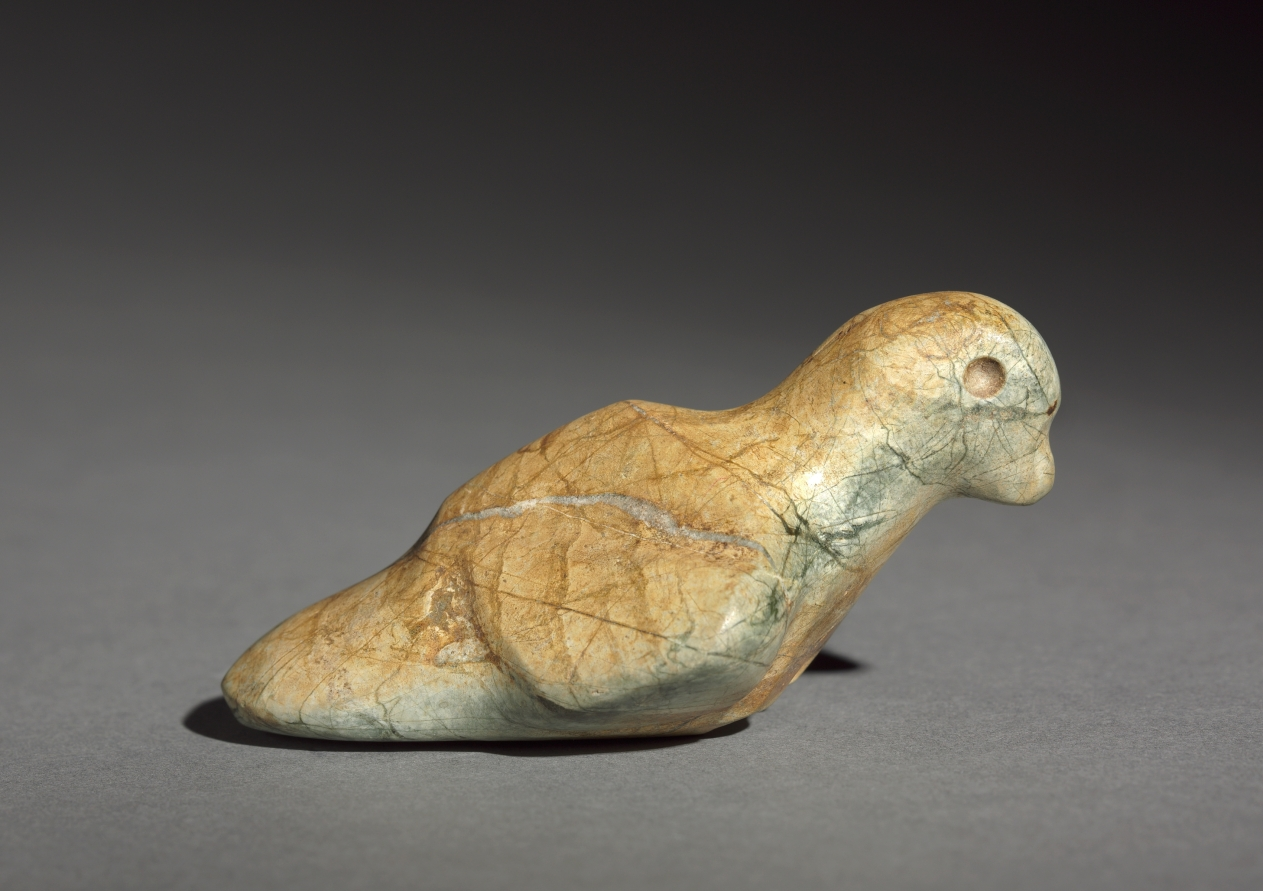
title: Bird Pendant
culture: Mesoamerica, Mexico, Guerrero, Mezcala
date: 100 BCE–300 CE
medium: polished gray-brown stone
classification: Sculpture